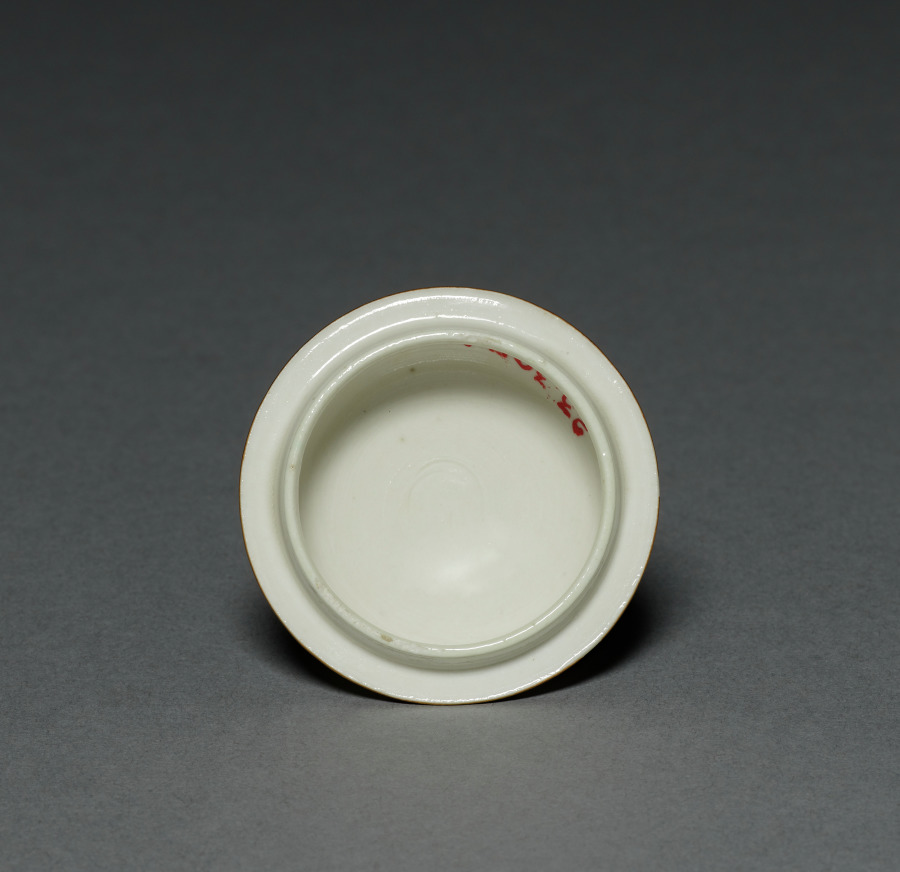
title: Teapot (lid)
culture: Germany, 18th century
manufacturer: Kloster-Veilsdorf Porcelain Factory (German)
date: late 1700s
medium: porcelain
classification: Ceramic